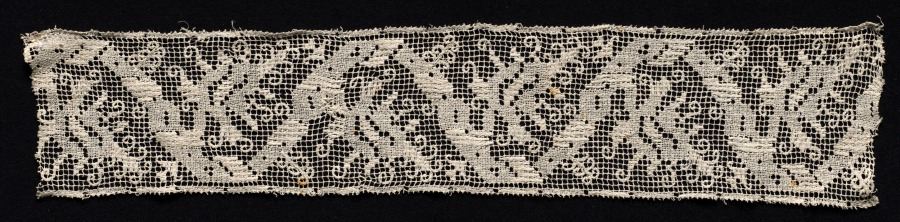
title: Fragment of a Band with Winding Design and Tendrils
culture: Italy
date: 1500s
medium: Bleached linen (est.): needle lace, filet/lacis (knotted ground and darned in one and two directions); bleached linen (est.)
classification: Lace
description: A scrolling vine with budding vegetation or a tendril motif is a recurring pattern in needle lace. The frequent use of the motif, adapted in lace from different centuries and regions, suggests that it was found in a pattern book.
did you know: Pattern books for lace-making and other needlework were aimed at well-to-do women and girls to encourage domestic virtue.